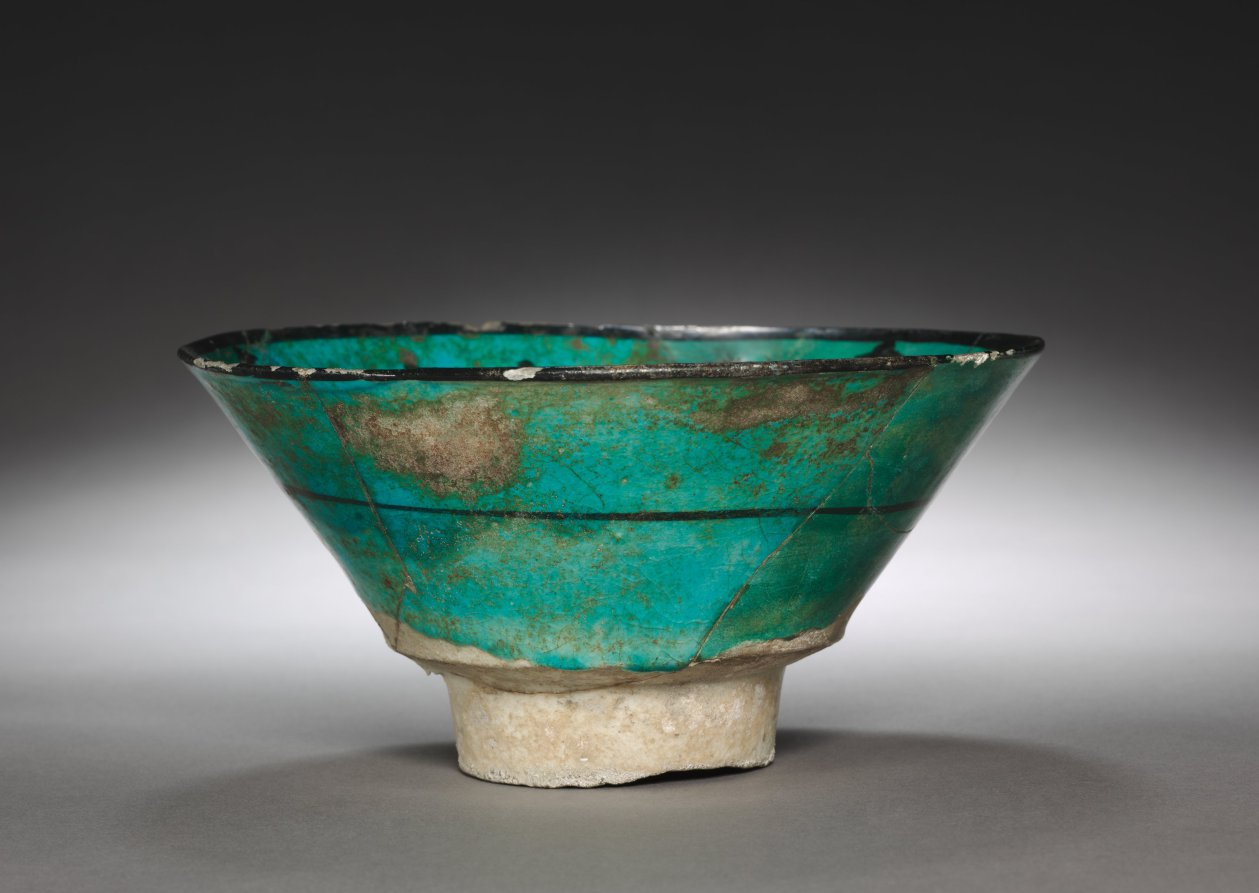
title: Bowl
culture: Syria (Raqqa), Ayyubid Period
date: early 1200s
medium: fritware with underglaze-painted design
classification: Ceramic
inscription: Squarish panels on inside each contain the same word, in a clumsy naskh script: it appears to read "al-baraka" Arabic for "the blessing."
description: This fritware bowl has wide flaring sides and a high foot. The decoration on the inside consists of a four-lobed device at center, surrounded by two circles. The inside walls carry a three-part design, with three oval motifs alternating with three squarish panels. Each panel contains an Arabic word.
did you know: The inside of the bowl contains saggar spurs.